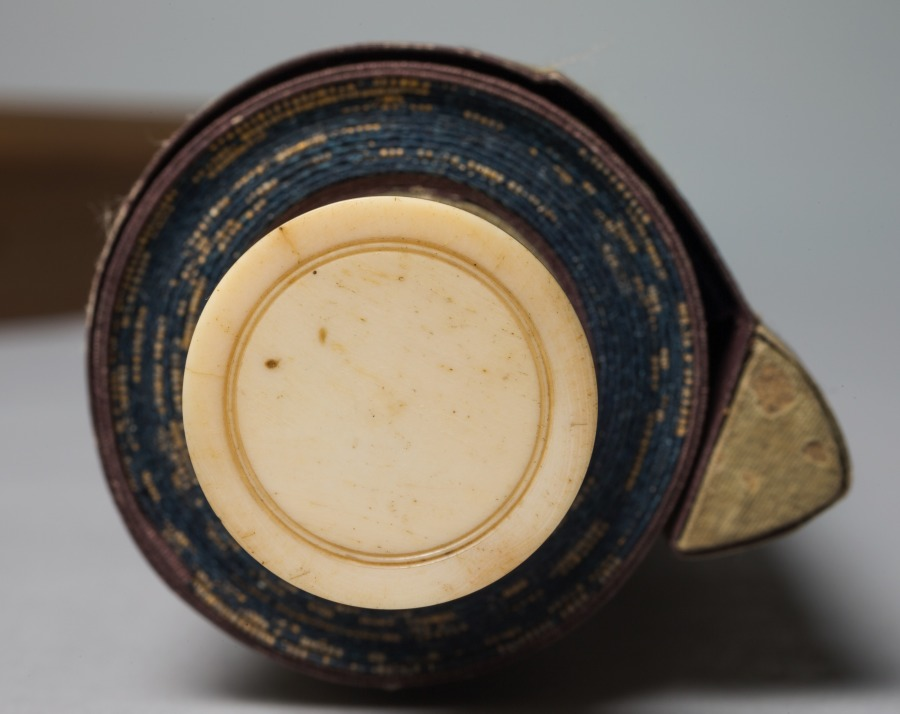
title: Monkeys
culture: Japan, Edo period (1615–1868)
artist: Gyokutei Katsu (Japanese)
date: c. 1800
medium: hanging scroll; ink on paper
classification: Painting